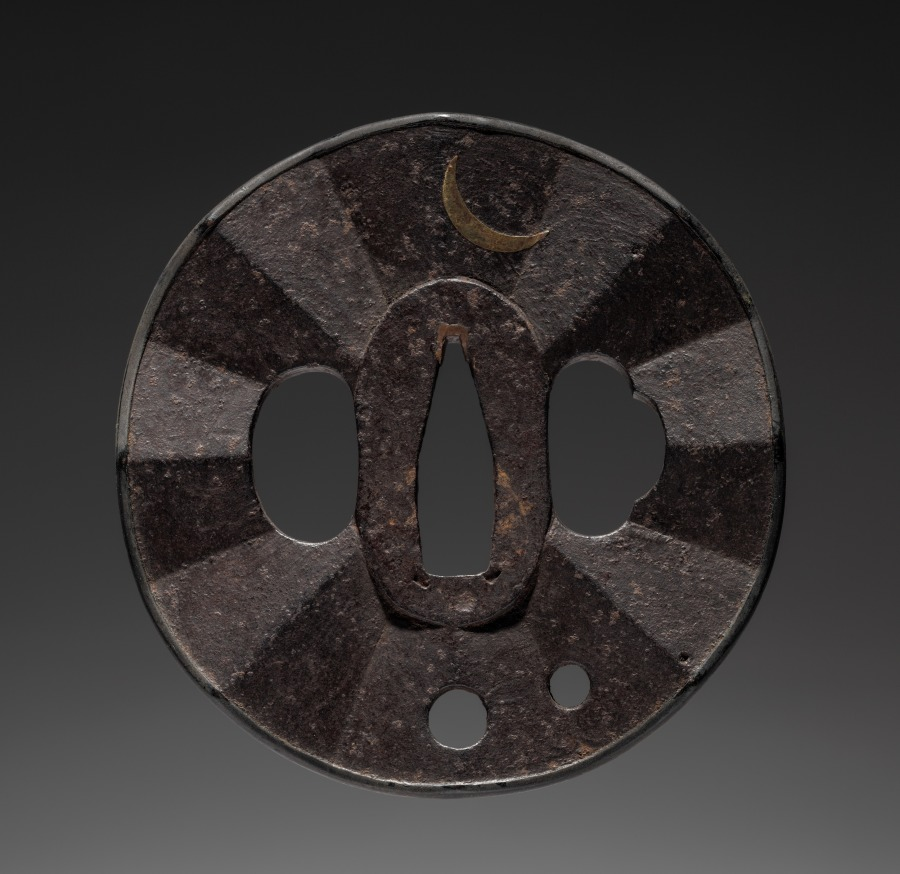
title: Sword Guard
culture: Japan, Edo period (1615–1868)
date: late 1700s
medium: iron with gold inlay (Myochin type)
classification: Arms and Armor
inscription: signed "Naomasa."